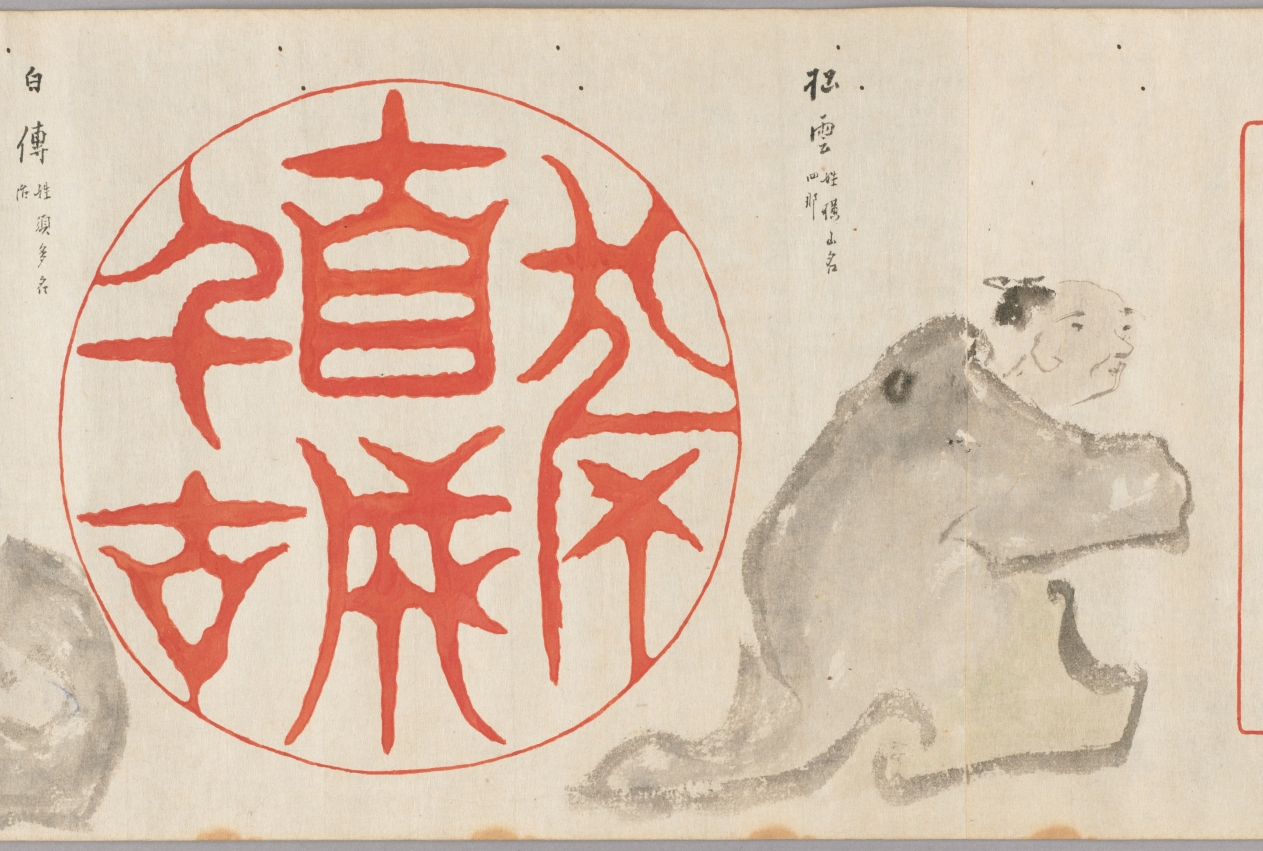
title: Chinese Seals and Poets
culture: Japan, Edo period (1615–1868)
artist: Hosokawa Rinkoku (Japanese, 1779–1843)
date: 1842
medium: handscroll; ink and color on paper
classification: Painting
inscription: Eight seal impressions are painted in red and alternate with sketchily painted figures. Artist's colophon at end of scroll.